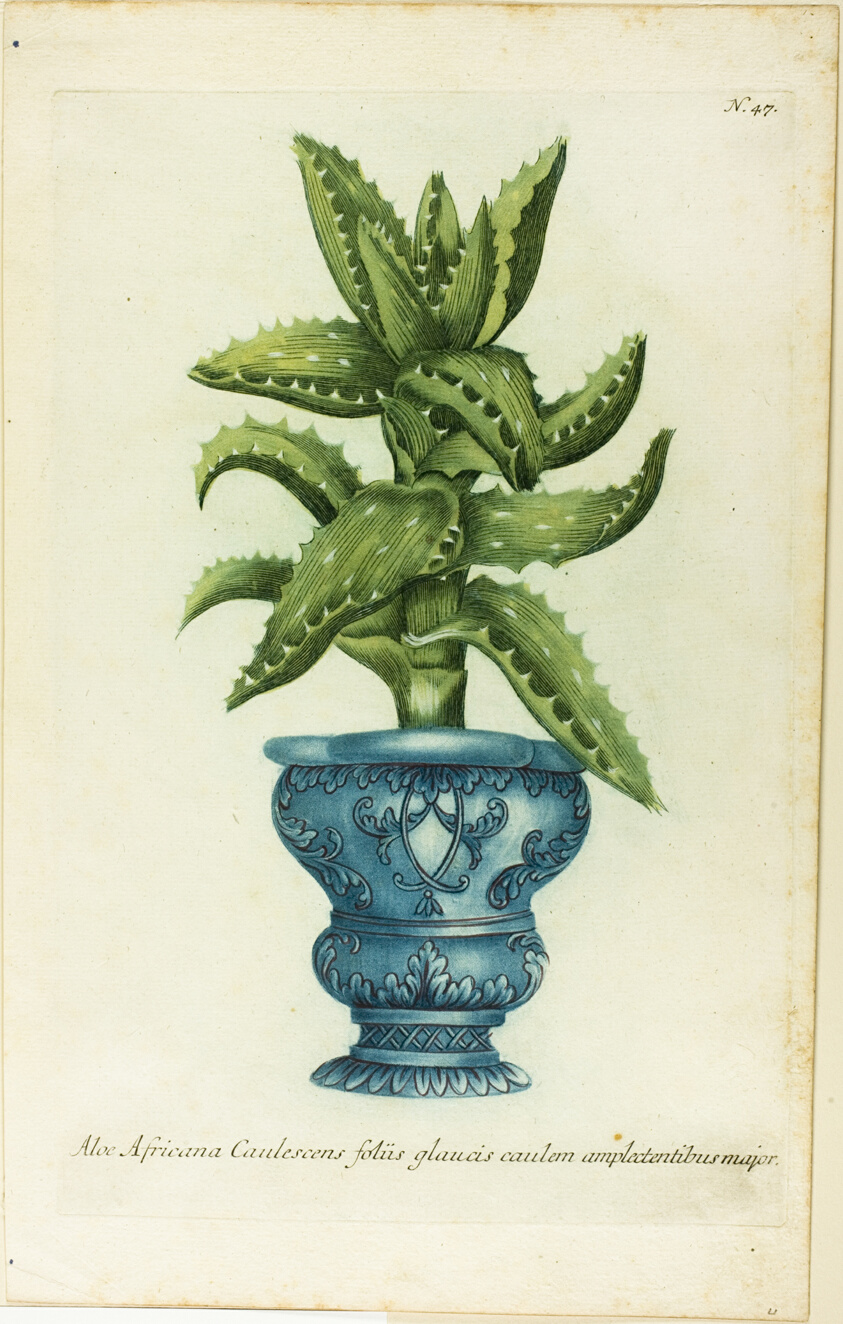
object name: Print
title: African Aloe, plate 47 from Phtanthoza Iconographia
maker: Published by Johann Wilhelm Weinmann; German, 1683-1741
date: 1736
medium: Color mezzotint and engraving on cream laid paper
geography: Germany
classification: mezzotint; print; prints and drawing